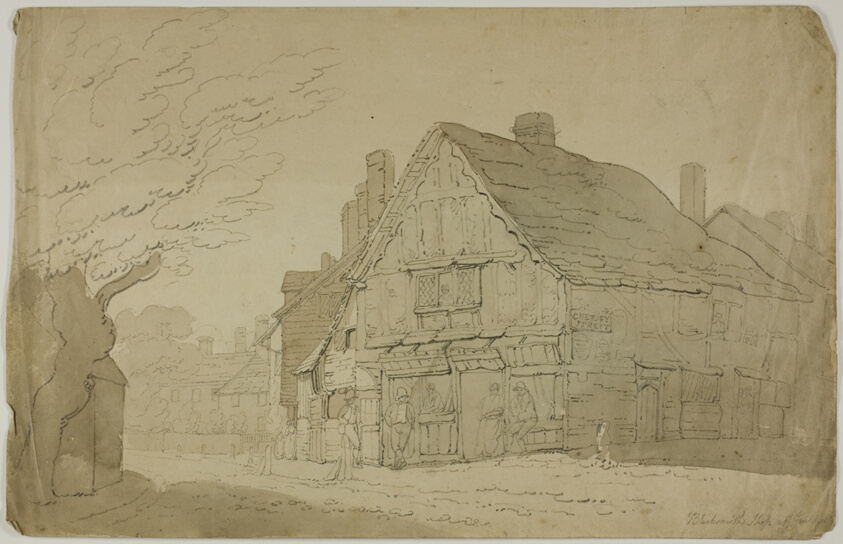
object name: Drawing and Watercolor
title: Blacksmith's Shop at Guildford (recto); Sketch of Two Tree Trunks (verso)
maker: George Wallwyn Shepheard (English, 1804-1852); or John Claude Nattes (English, c. 1765-1822); or circle of Joseph Powell (English, 1780-1834)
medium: Graphite with brush and brown wash (recto), and graphite (verso), on tan wove paper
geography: England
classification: ink or chalk wash; drawings (visual works); prints and drawing